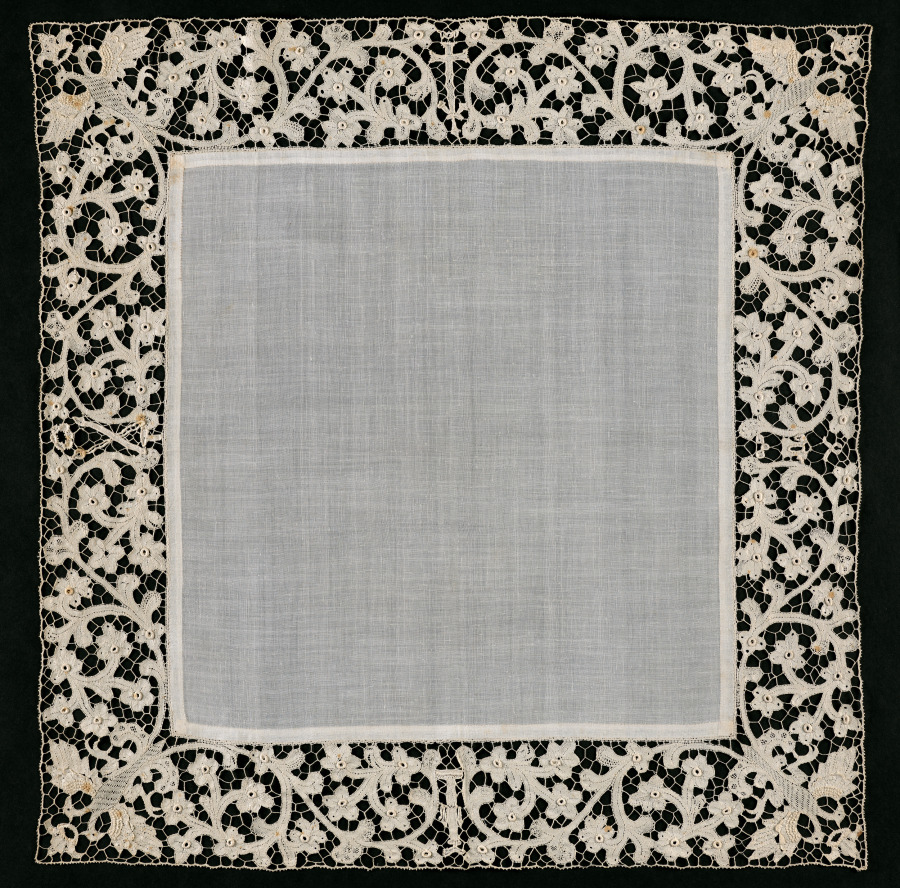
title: Chalice Veil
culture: Italy, Milan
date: 1600s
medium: lace, needlepoint and bobbin (Punto di Milano)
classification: Lace